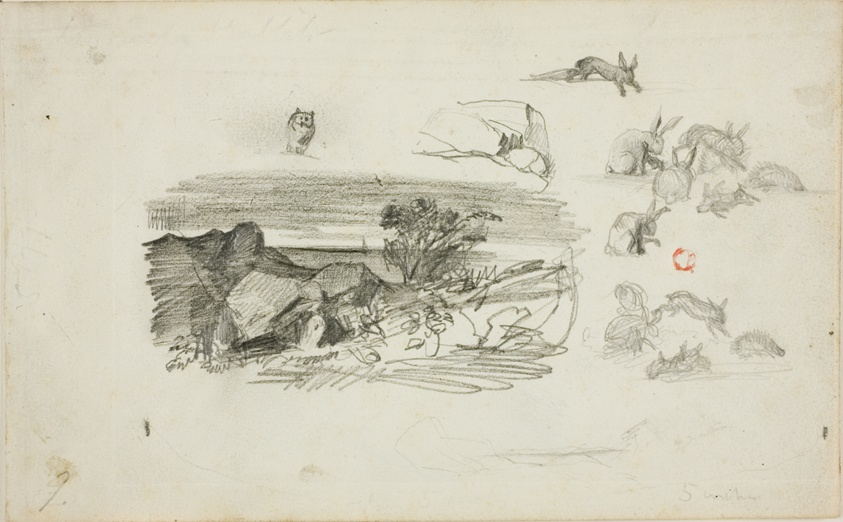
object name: Drawing and Watercolor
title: Sketches: Rocky Setting and Rabbits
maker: Charles François Daubigny (French, 1817-1878)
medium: Graphite on ivory wove paper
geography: France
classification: graphite; drawings (visual works); prints and drawing